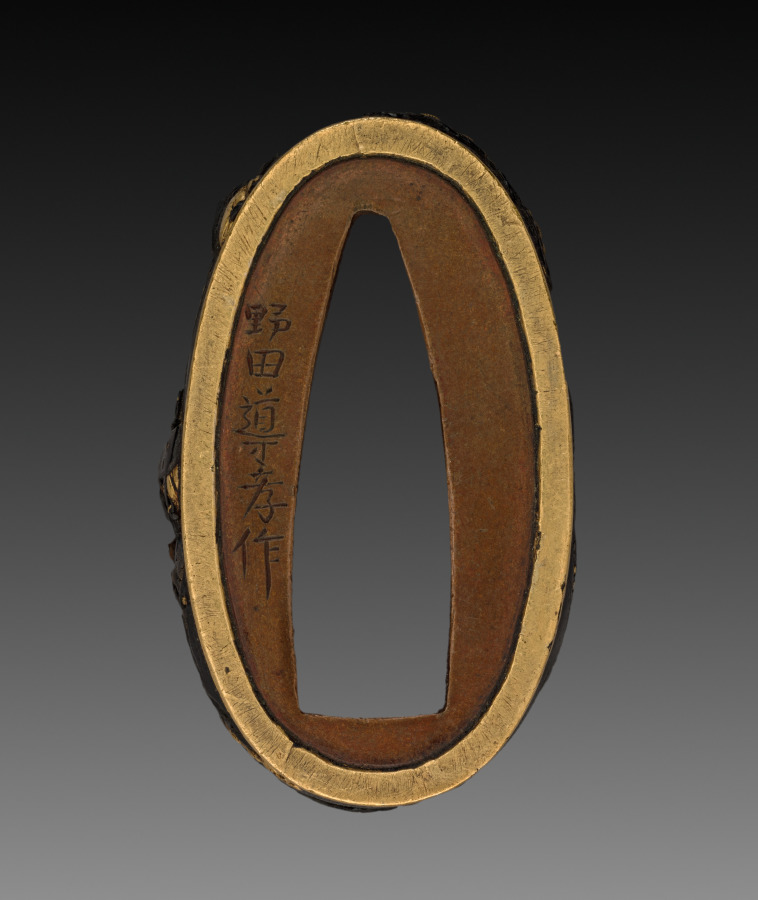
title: Sword-Hilt Collar (Fuchi)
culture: Japan, Edo period (1615–1868)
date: 1700–1850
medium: shakudo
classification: Arms and Armor